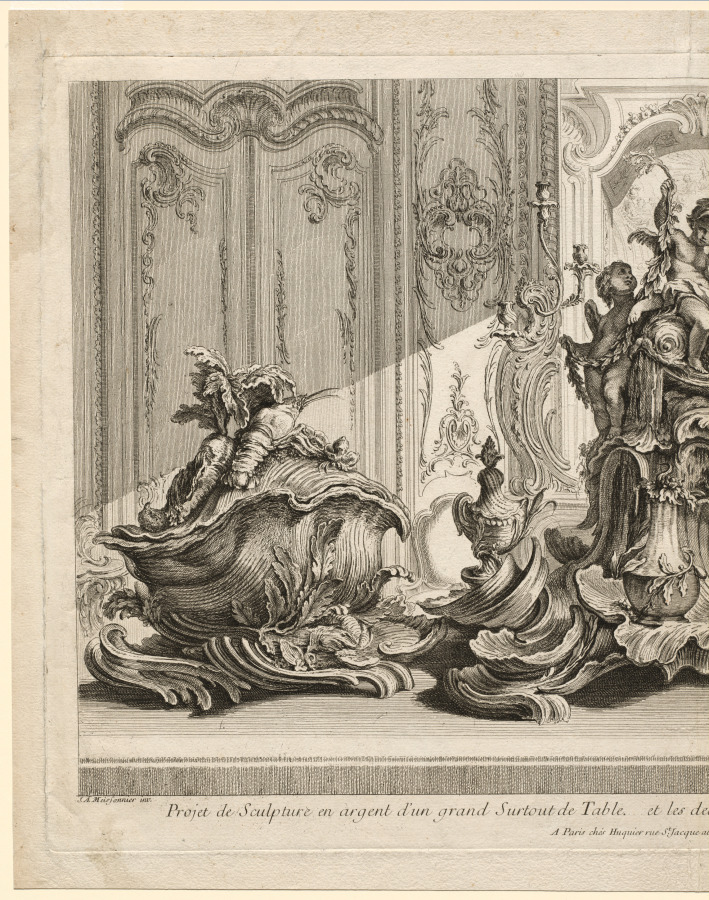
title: Silver Sculptural Project for a Large Centerpiece and Two Tureens Which Have Been Executed for His Lordship the Duke of Kingston, plate 115 from Works of Juste-Aurèle Meissonier (Oeuvre de Juste-Aurèle Meissonier)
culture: France, 18th century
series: Works of Juste-Aurele Meissonier (Oeuvre de Juste- AurPle Meissonier), plate 115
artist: Gabriel Huquier (French, 1695–1772)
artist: after Juste-Aurèle Meissonnier (French, 1695–1750)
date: c. 1735–37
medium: etching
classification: Print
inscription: J. A. Meissonier inv./Huquier Sculp.; Inscriptions: Below title: A Paris chJs Huquier rue St Jacque au coin de celle des Matburins CPR.; upper right: 115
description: In addition to documenting an important commission, this etching endorses the designer’s stylish products by associating them with social status. Meissonnier’s name appears below the image on the left, and the large inscription identifies the illustrious patron, the Duke of Kingston, known well in Parisian society. Perhaps functioning similarly to a magazine advertisement today, the fashionable rococo-style scene invites viewers to imagine themselves as the owners of the luxurious tableware. Contrary to the inscription at the bottom of the sheet, the etching actually shows two views of only one of the tureens made for the Duke of Kingston (the tureen displayed nearby). The tureen not depicted features a crab instead of a lobster on the lid. The grand sculptural centerpiece was probably never produced.